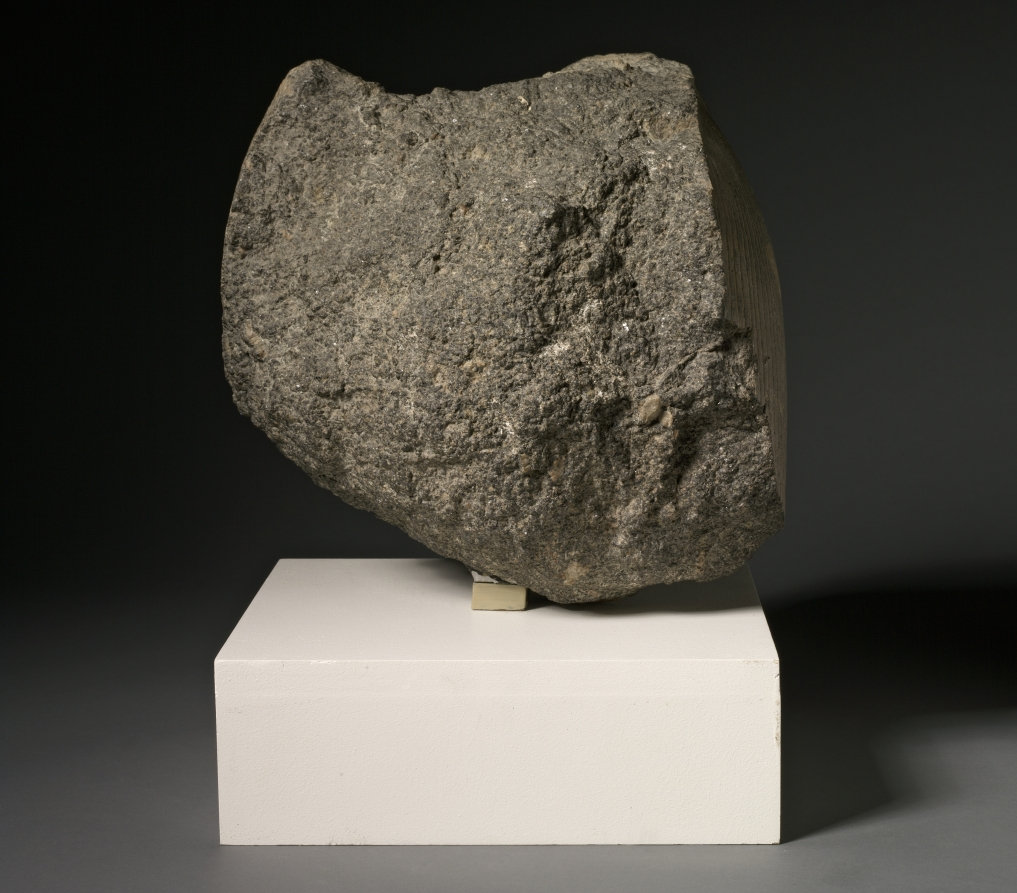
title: Head of Sekhmet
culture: Egypt, Thebes(?), New Kingdom (1540–1069 BCE), Dynasty 18, reign of Amenhotep III (1390–1352 BCE)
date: c. 1391–1353 BCE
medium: granodiorite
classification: Sculpture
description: This lioness head once belonged to a grand statue of the goddess Sekhmet, "the powerful one," probably seated and wearing a tight dress. Possibly appealing to her healing aspect, Pharaoh Amenhotep III, often described as “beloved of Sekhmet,” commissioned and dedicated hundreds of large granodiorite Sekhmet sculptures in his Theban mortuary temple. Thus, this head likely comes from Thebes, perhaps later moved across the Nile—like many such sculptures—to the temple of Mut, a related deity, at Karnak. Behind her stylized ruff, Sekhmet wears a wig, once crowned with a sun disk and uraeus, the stylized cobra symbolizing royal or divine power.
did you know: Amenhotep III may have dedicated 730 statues of Sekhmet, two for each day of the year.